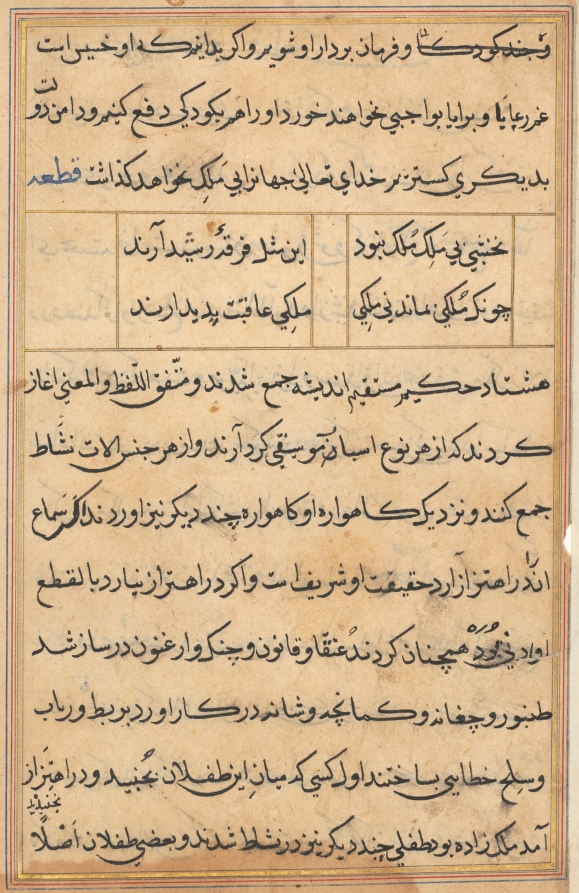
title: Page from Tales of a Parrot (Tuti-nama): text page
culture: Mughal India, court of Akbar (reigned 1556–1605)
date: c. 1560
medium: gum tempera, ink, and gold on paper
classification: Painting